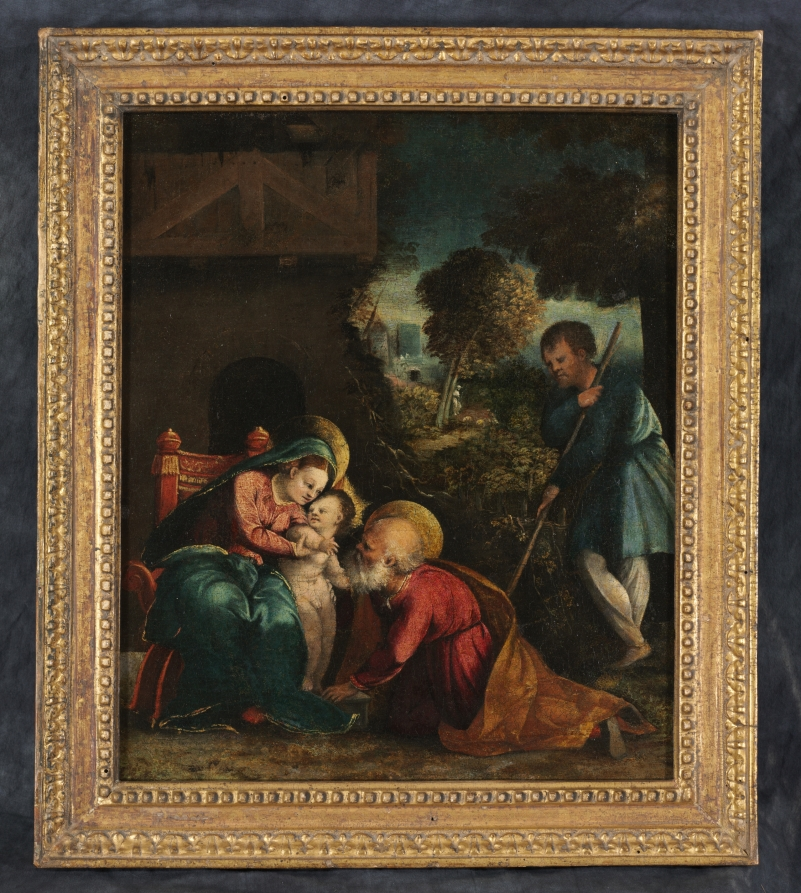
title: Holy Family with a Shepherd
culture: Italy, 16th century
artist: Battista Dossi (Italian, c. 1490–1548)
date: early 1520s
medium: oil on canvas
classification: Painting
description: In this image of the Holy Family, Joseph and Mary lean in to admire the Christ Child while a shepherd looks on, leaning on his staff. Before executing this painting, Battista visited Rome, including an extensive study of Raphael's works. Afterward, Battista began a second style of painting, seen in the flexible pose of Christ, the small hands of the adult figures, the high foreheads, and each figure looking sideways or upward. The landscape is impressionistic and grainy as mysterious silvery-blue moonlight accents the thickly wooded landscape. Rich reds, browns, and greens color the picturesque landscapes, typical of Battista's second style. This small painting was originally attributed to Battista Dossi's brother, Dosso. Both brothers served as court painters to the Duke Alfonso I of Ferrara. However, the symmetry and vibrant colors of the painting, as well as the facial styles of the figures, characterize the work of Battista Dossi.